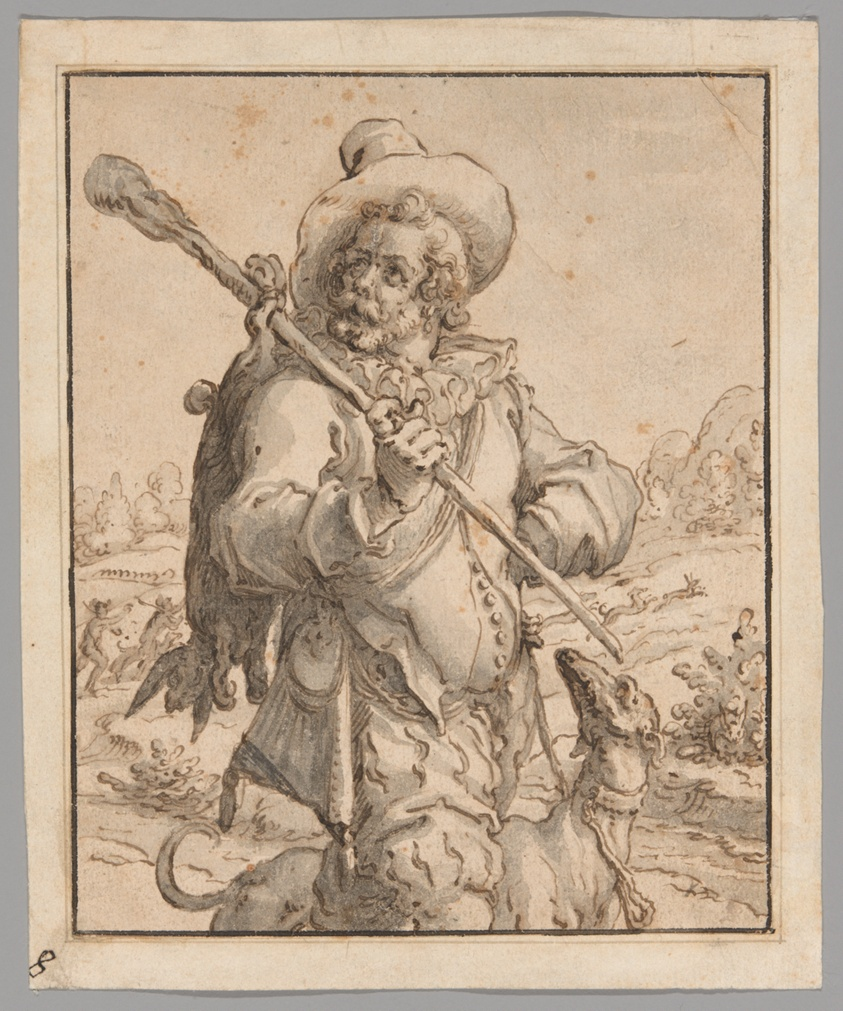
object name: Drawing and Watercolor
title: A Huntsman with a Dead Hare and a Dog (Study for "Terra")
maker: Jacques de Gheyn II; Dutch, 1565-1629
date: 1590/95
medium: Pen and brown ink and brush and gray wash, over touches of charcoal, ruled with pen and black ink, on ivory laid paper, incised with a stylus for transfer, laid down on cream laid paper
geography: Netherlands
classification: ink or chalk wash; drawings (visual works); prints and drawing